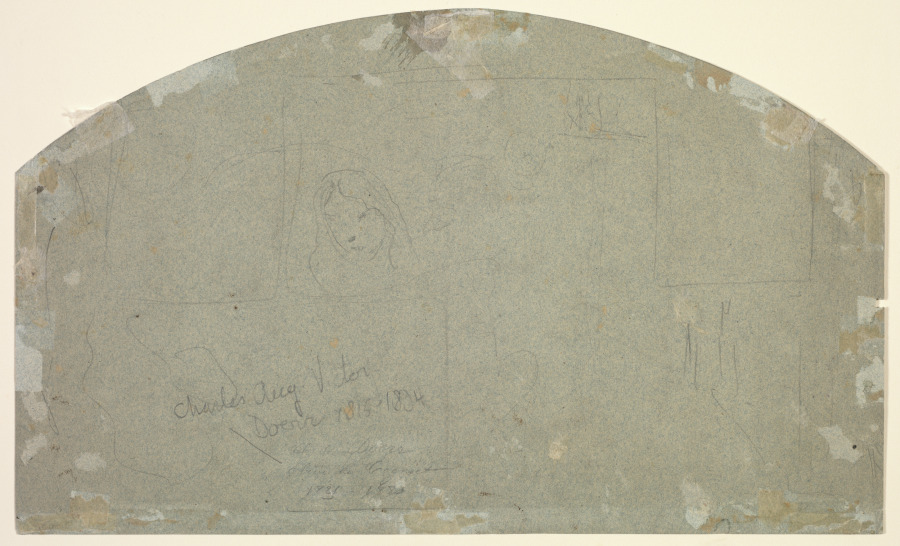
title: Sketches (verso)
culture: France, 19th century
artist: Gustave Doré (French, 1832–1883)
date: c. 1848–49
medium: graphite (verso)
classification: Drawing